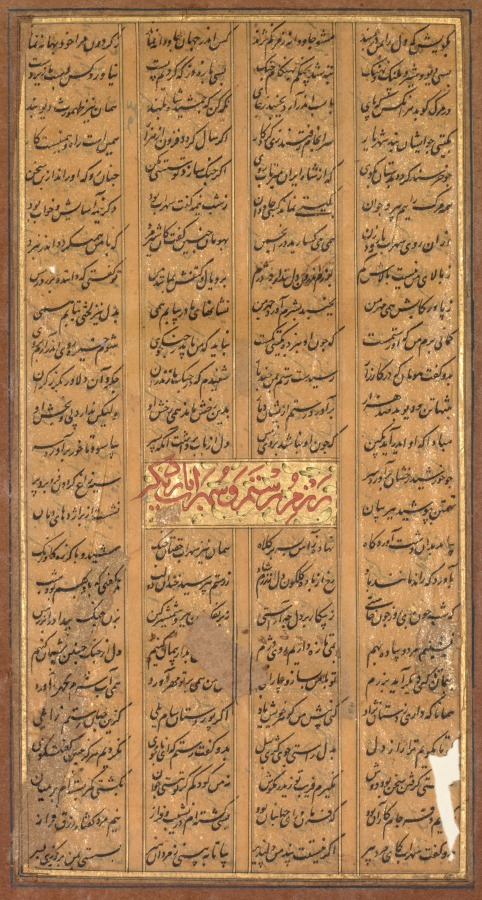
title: Text of Rustam and Suhrab, from the Shah-nama of Firdausi (Persian, c. 934–1020) (verso)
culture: India, Bijapur, Deccan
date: c. 1610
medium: Gum tempera, ink, and gold on paper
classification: Painting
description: This page of text from the jewel-like copy of the Shah-nama made in the southern Indian city of Bijapur describes the events leading to Rustam’s accidental slaying of his own son Suhrab. The larger text in red is a chapter heading, which reads: “The single combat between Rustam and Suhrab once more.”